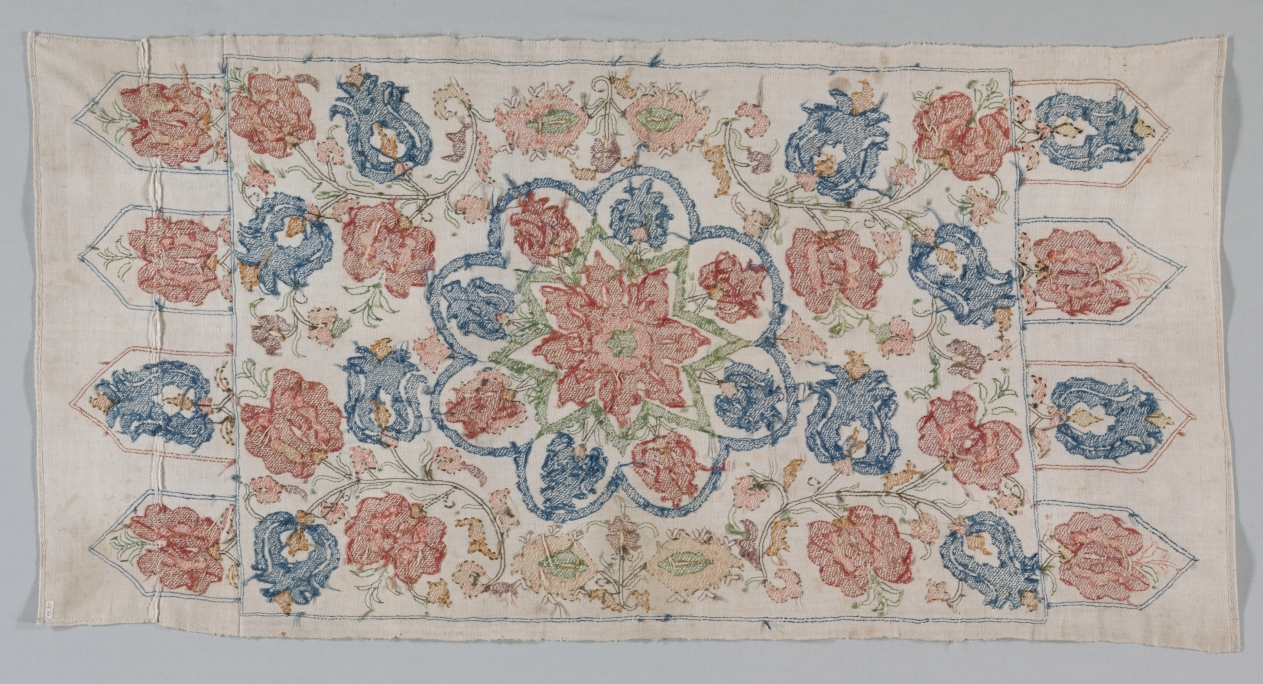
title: Embroidered cushion cover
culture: Turkey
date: 1700s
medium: plain weave: linen; embroidery, self-couching and herringbone stitches: silk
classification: Embroidery